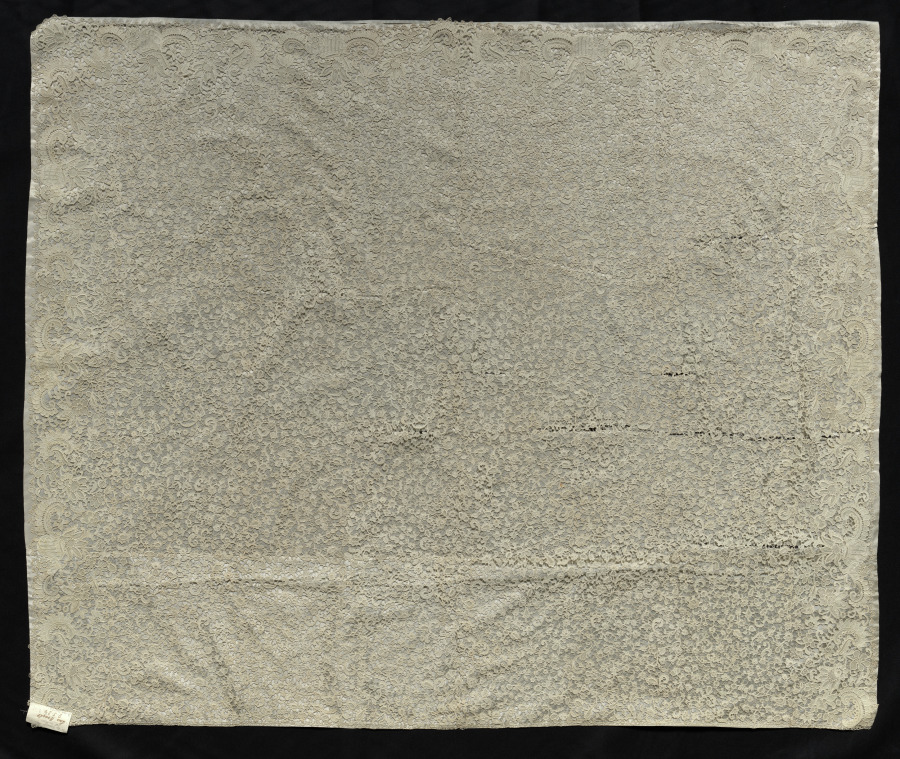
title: Lace Flounce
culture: Italy, Venice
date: 1800s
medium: Linen: needle lace (Venetian rose point)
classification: Lace